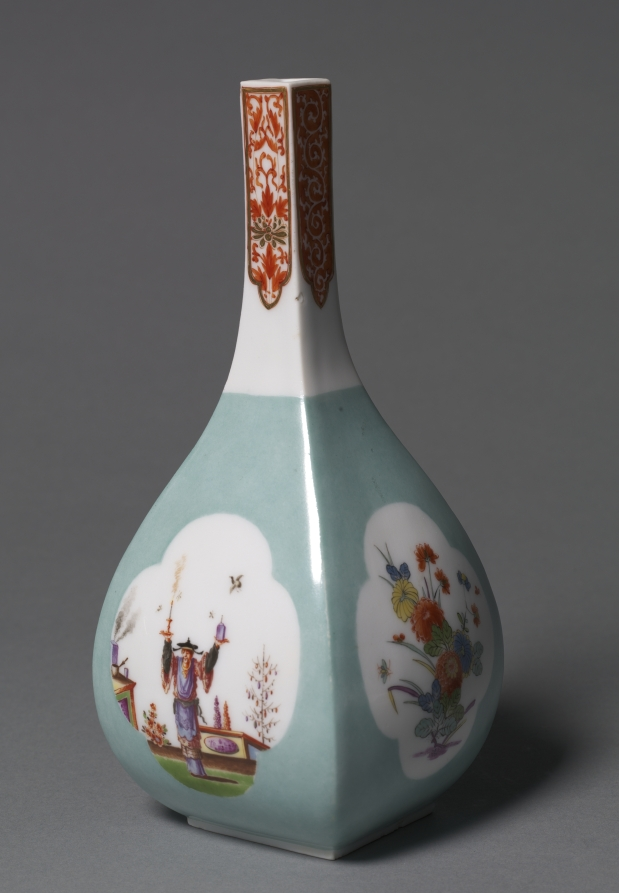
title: Saki Bottle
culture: Germany, Meissen, 18th century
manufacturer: Meissen Porcelain Factory (German, est. c. 1710)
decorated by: probably by Johann Gregor Herold (German, 1696–1775)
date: c. 1730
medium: porcelain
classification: Ceramic